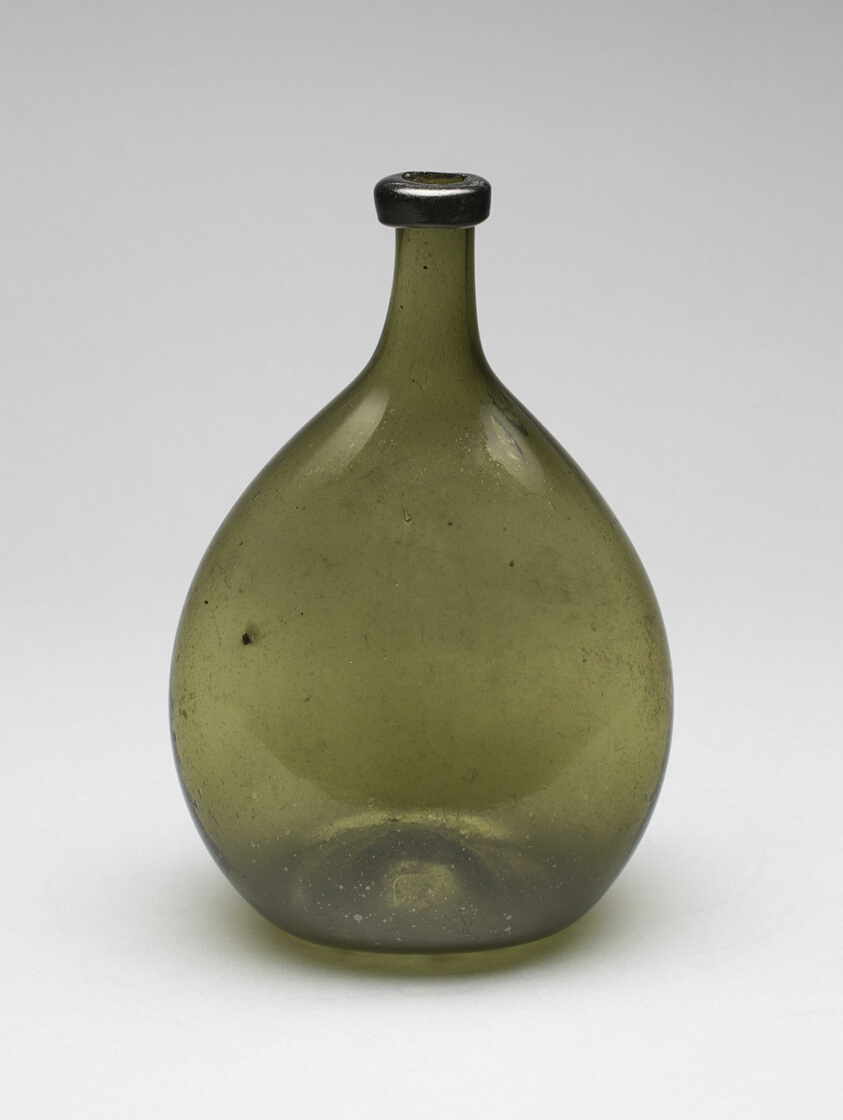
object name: Glass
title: Bottle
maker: Mantua Glass Works; American, 1821–1829; Mantua, Ohio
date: 1821–29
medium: Glass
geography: Mantua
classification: bottle; glass; american decorative arts; american arts; decorative arts